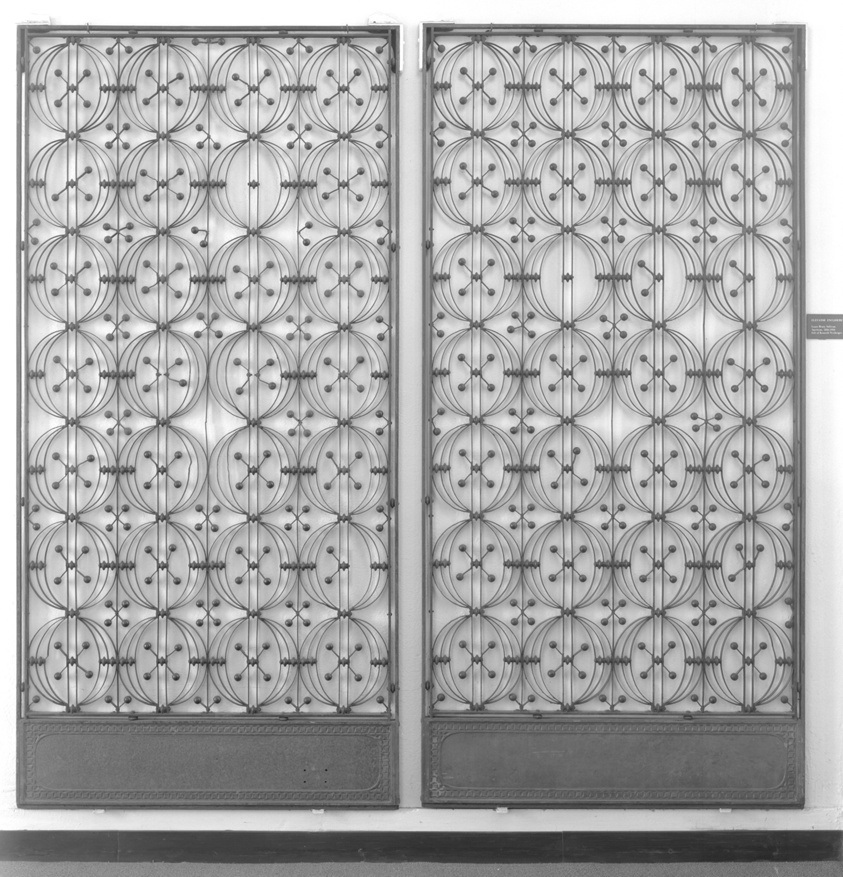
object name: Architectural fragment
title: Chicago Stock Exchange Building: Two Elevator Enclosure Grilles, with Base Plates and Side Support Bars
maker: Adler & Sullivan, Architects (American, 1883-1896)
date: 1893/94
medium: Cast and wrought iron with copper plating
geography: Chicago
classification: grille; iron; metal; architectural fragment; architecture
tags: Chicago, architectural fragments, architecture, building, elevator, illinois, ornaments